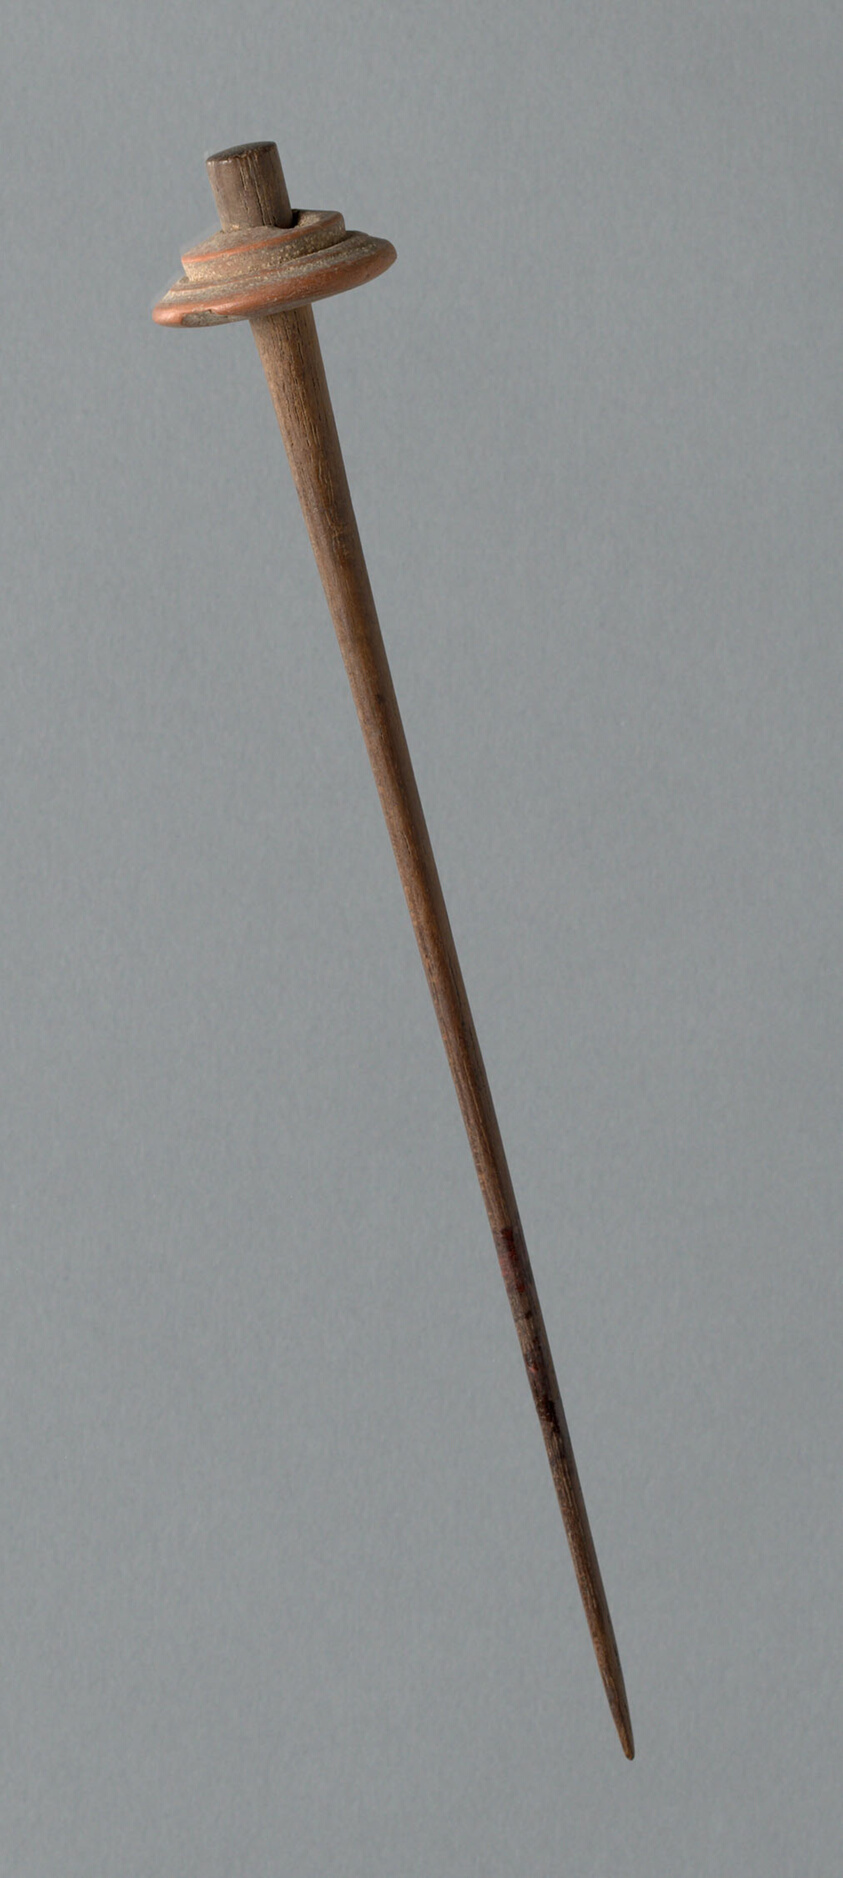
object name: non-art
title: Wooden Spindle with Ceramic Whorl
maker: Peru, Possibly central coast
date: 1000/1476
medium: Wood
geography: Peru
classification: spindles (textile working equipment); textile working equipment; accessories (object genre); textile